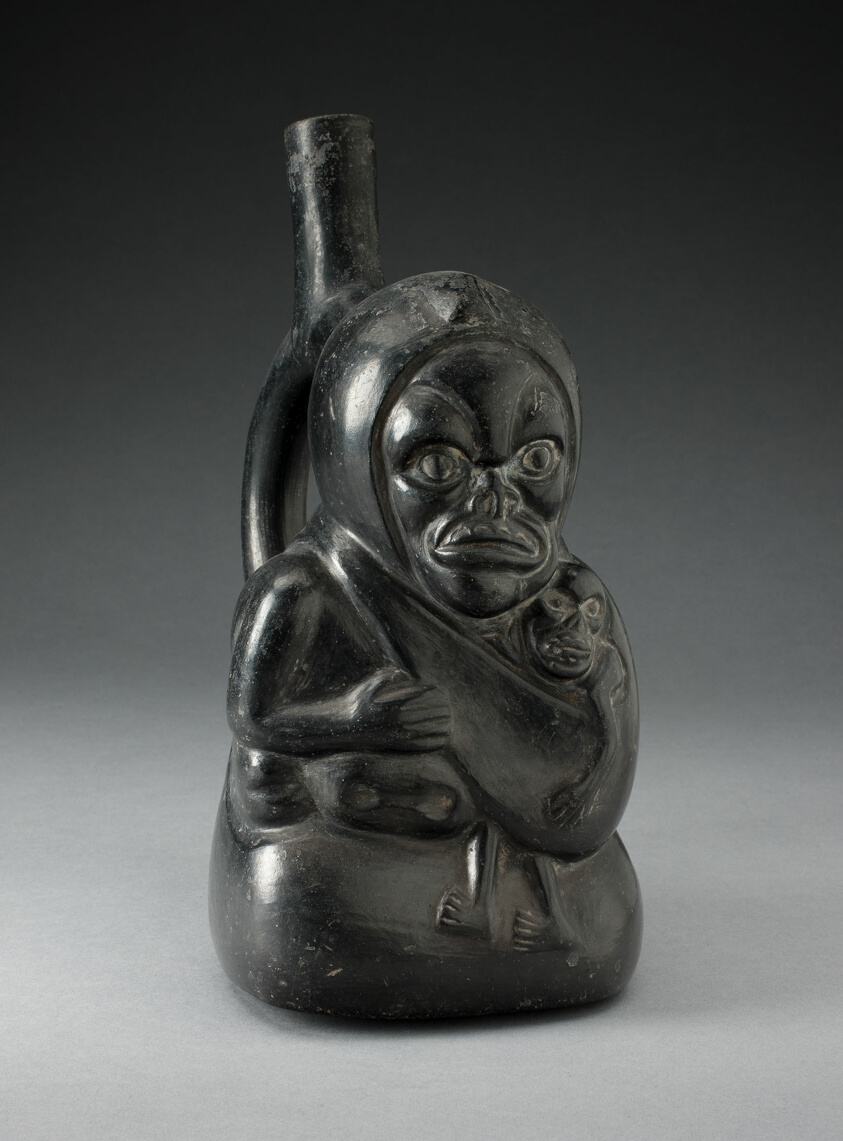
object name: Vessel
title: Handle Spout Vessel in the Form of a Skeletal Figure Holding a Child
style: moche, south american, andes, Arts of the Americas, andean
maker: Moche (Chimbote, Santa Valley, north coast, Peru)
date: 100 BCE–500 CE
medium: Ceramic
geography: Peru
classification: earthenware; ceramics; vessel; art of the americas